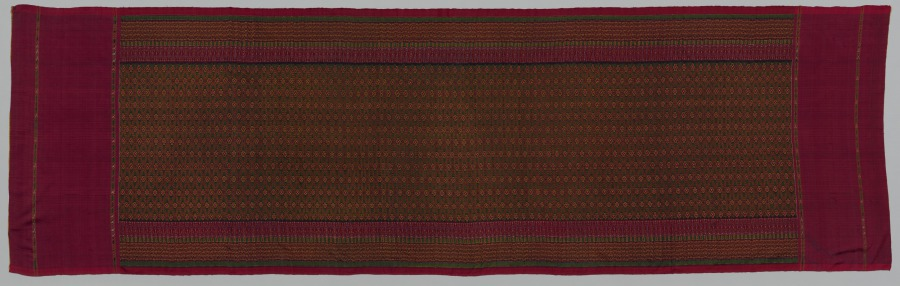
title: Silk "Sampot" (Loin Cloth)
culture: Cambodia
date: early 1900s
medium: Silk: tabby weave, weft ikat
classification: Textile